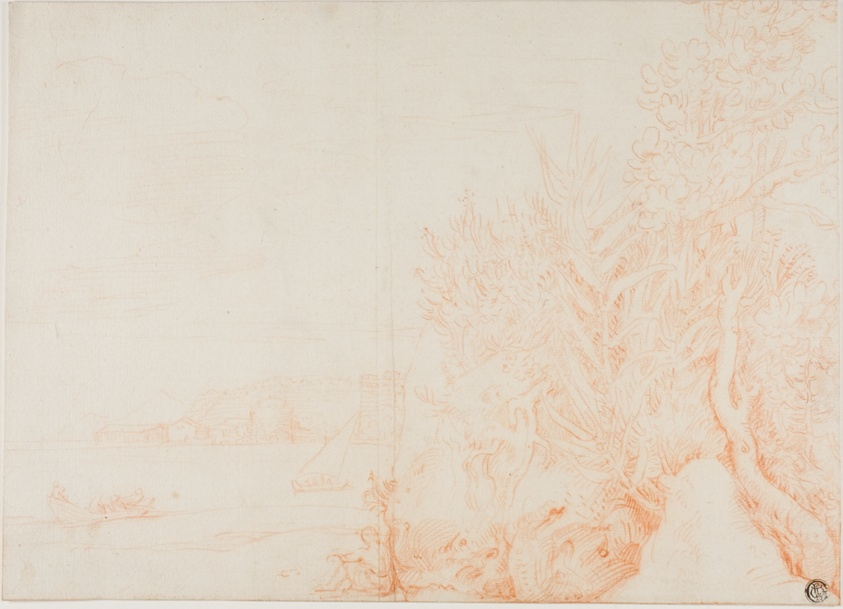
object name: Drawing and Watercolor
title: View of Harbor, with Figure and Vegetation in Foreground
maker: Style of Adrien Manglard (French, 1695-1760)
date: c. 1700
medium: Red chalk on ivory laid paper, laid down on cream laid paper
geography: France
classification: chalk; paper; drawings (visual works); prints and drawing